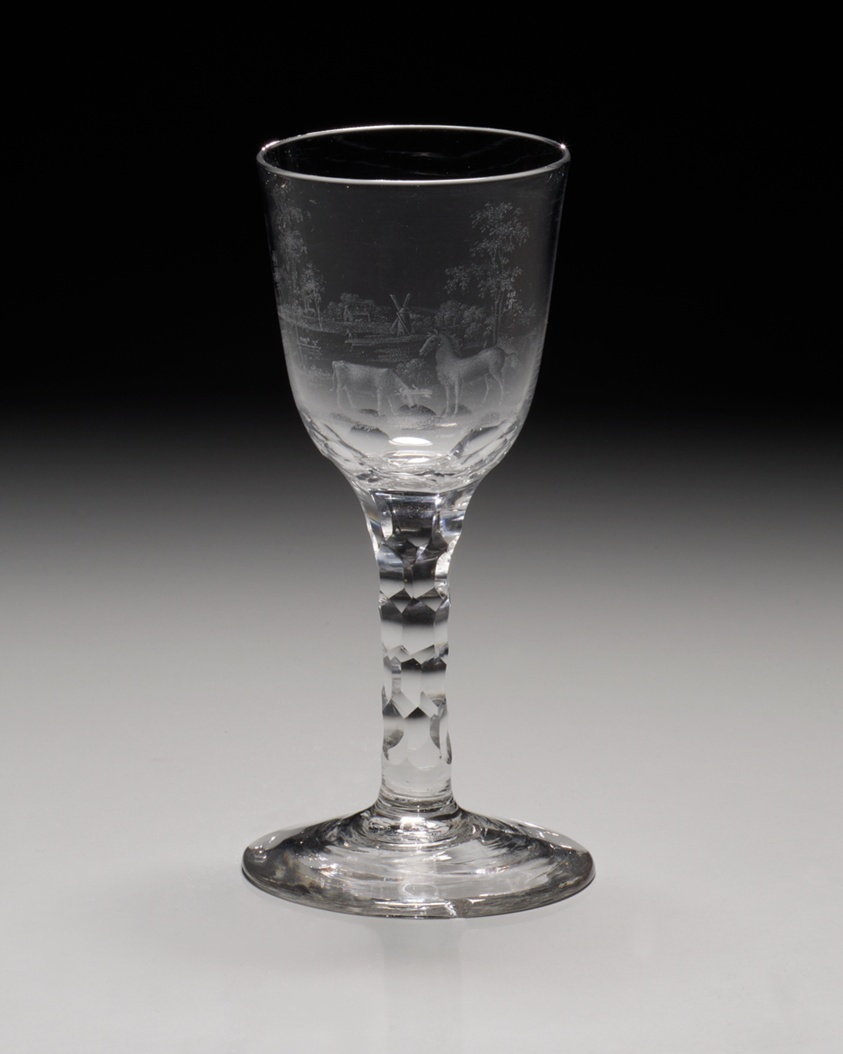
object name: Glass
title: Wine Glass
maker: England or Netherlands; Engraving attributed to David Wolff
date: c. 1775/98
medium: Glass; cut and stipple engraved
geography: England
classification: drinking vessel; glass; european decorative arts